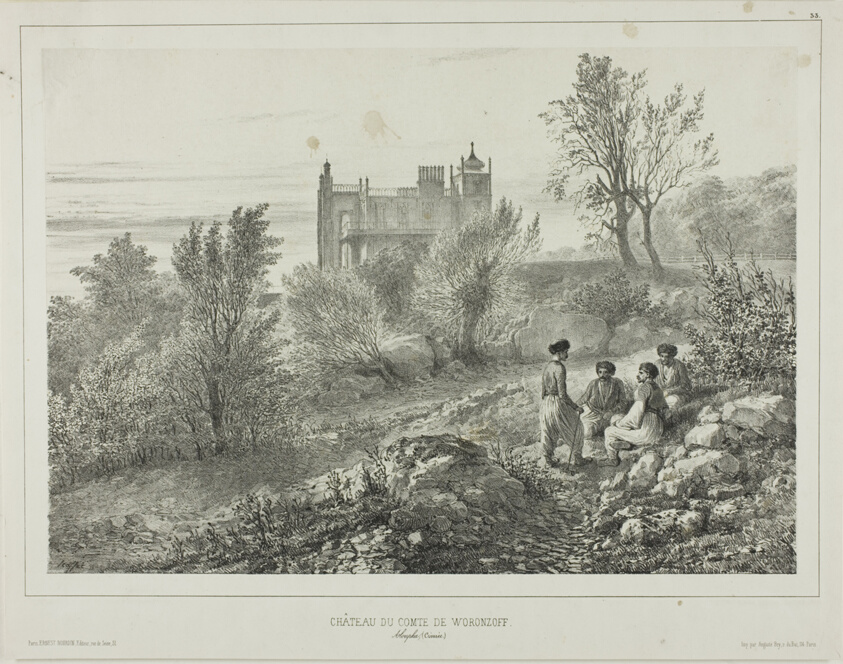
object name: Print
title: The Château of Count Woronzoff, Aloupka, Crimea, August 12, 1837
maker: Denis Auguste Marie Raffet (French, 1804-1860); printed by Auguste Bry (French, 19th century); published by Éditeur Ernest Bourdin (French, active 19th century)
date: 1840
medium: Lithograph in black on ivory chine laid down on ivory wove paper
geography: France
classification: lithograph; print; prints and drawing